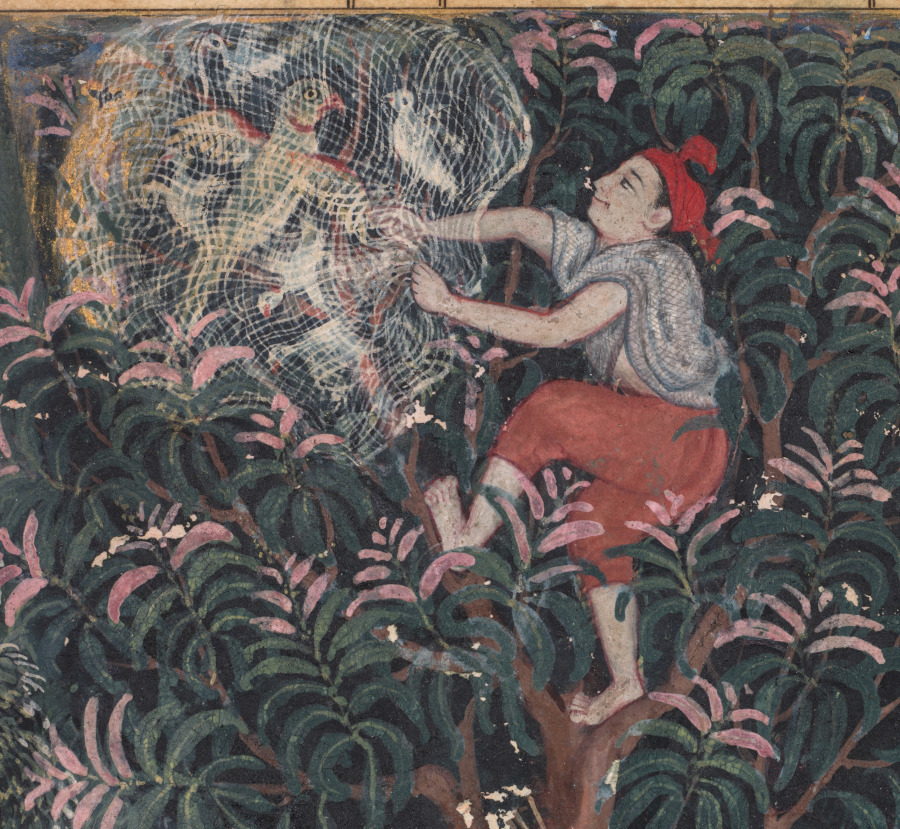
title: The hunter throws away the baby parrots, who pretend to be dead, and captures the mother, from a Tuti-nama (Tales of a Parrot): Fifth Night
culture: Mughal India, court of Akbar (reigned 1556–1605)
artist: attributed to Basavana (Indian, active c. 1560–1600)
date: c. 1560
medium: gum tempera, ink, and gold on paper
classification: Painting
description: Despite the chess-playing monkey’s grim end, the baby parrots continued to cavort with the fox cubs. One day the mother fox discovered that her cubs had been eaten by a panther. Blaming the parrots, she lured a hunter to their tree. The hunter climbed the tree and ensnared the mother parrot and her babies. The mother instructed her young to play dead, then pleaded with the hunter to take her alone, saying that since she knew the art of healing she would fetch a high price. Lush vegetation and a stream of water painted with a soft brush indicate a fresh new stylistic vision that represents a departure from Indian and Persian styles that came before.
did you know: The pink leaves are new shoots that have not yet turned green.